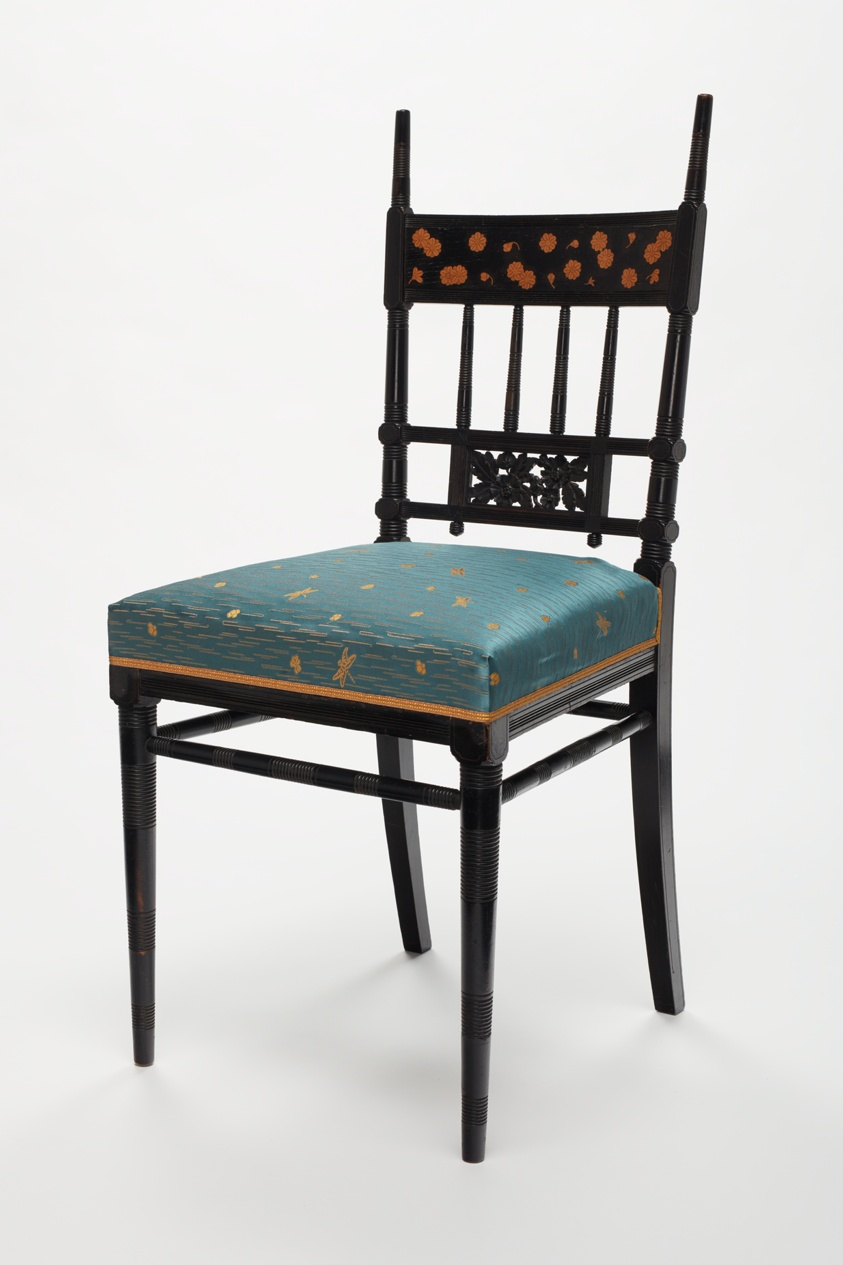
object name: Furniture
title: Side Chair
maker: Herter Brothers (American, 1864–1906); New York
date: 1877–85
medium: Ebonized cherry, various inlaid woods, and upholstery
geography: New York City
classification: seating; furniture; american decorative arts; american arts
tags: furniture